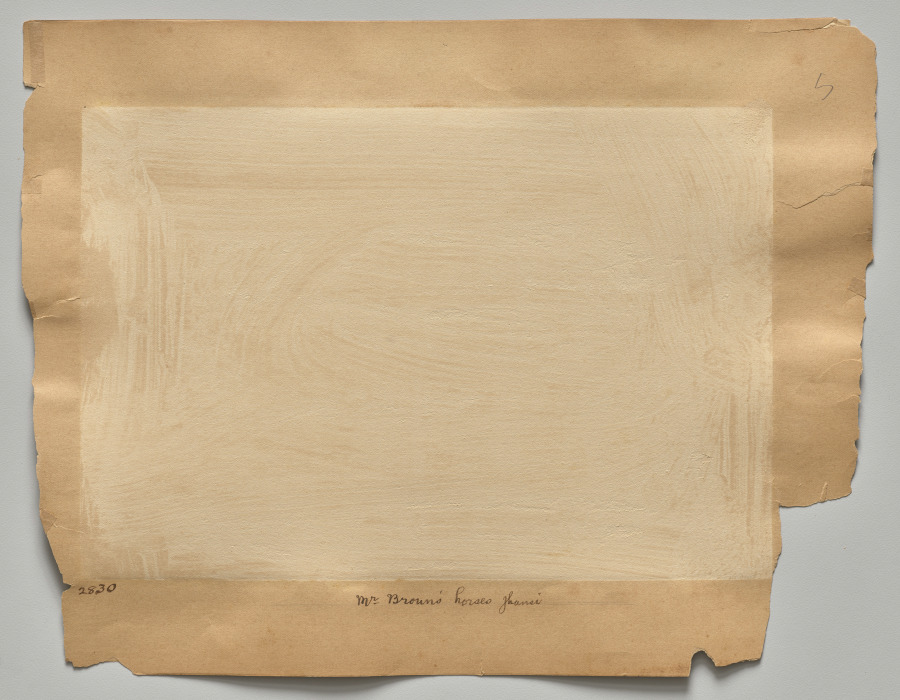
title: Captain Harris and Ruston, Jhansi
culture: India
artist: Raja Deen Dayal (Indian, 1844–1905)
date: c. 1882–87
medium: albumen print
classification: Photograph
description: These photographs are part of an album, now disassembled, of around 105 photographs taken in India between 1885 and summer 1887 that provide glimpses into the lives of the British colonial elite and royal and upper-class Indians. The museum holds another group of 37 pictures from this album (2016.266), which was probably commissioned by a British civil servant visiting or working in India around 1888 as a personal souvenir of his experiences there.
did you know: Raja Deen Dayal is regarded now, and was considered during his lifetime, to be India’s most important 19th-century photographer.